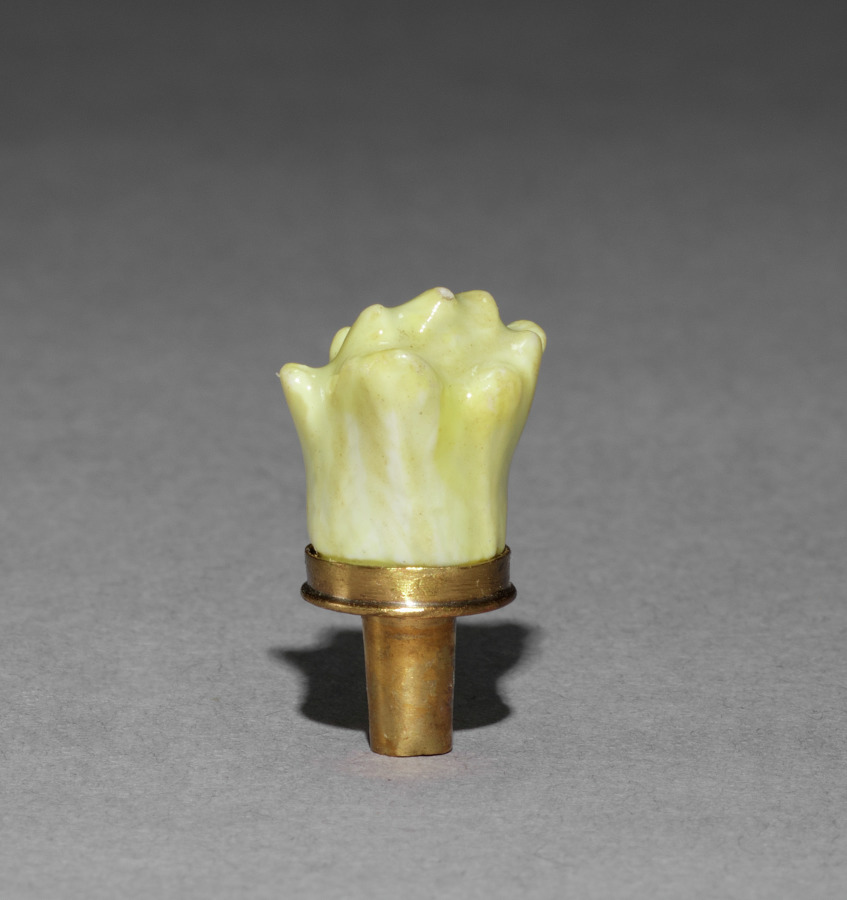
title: Stopper for a Scent Bottle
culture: Germany, Berlin, 18th century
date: 1780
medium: porcelain with gilt metal mounts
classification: Miscellaneous